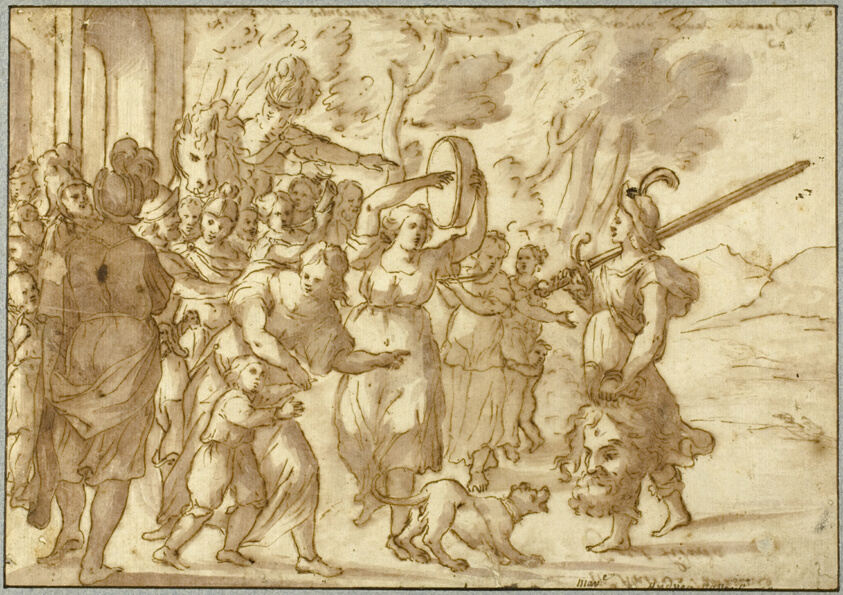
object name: Drawing and Watercolor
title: Truimph of David Over Goliath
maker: Andrea Passanini (possibly Italian, 16th century)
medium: Pen and brown ink, with brush and brown wash, over traces of graphite on ivory laid paper, laid down on card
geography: Italy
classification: drawings (visual works); prints and drawing